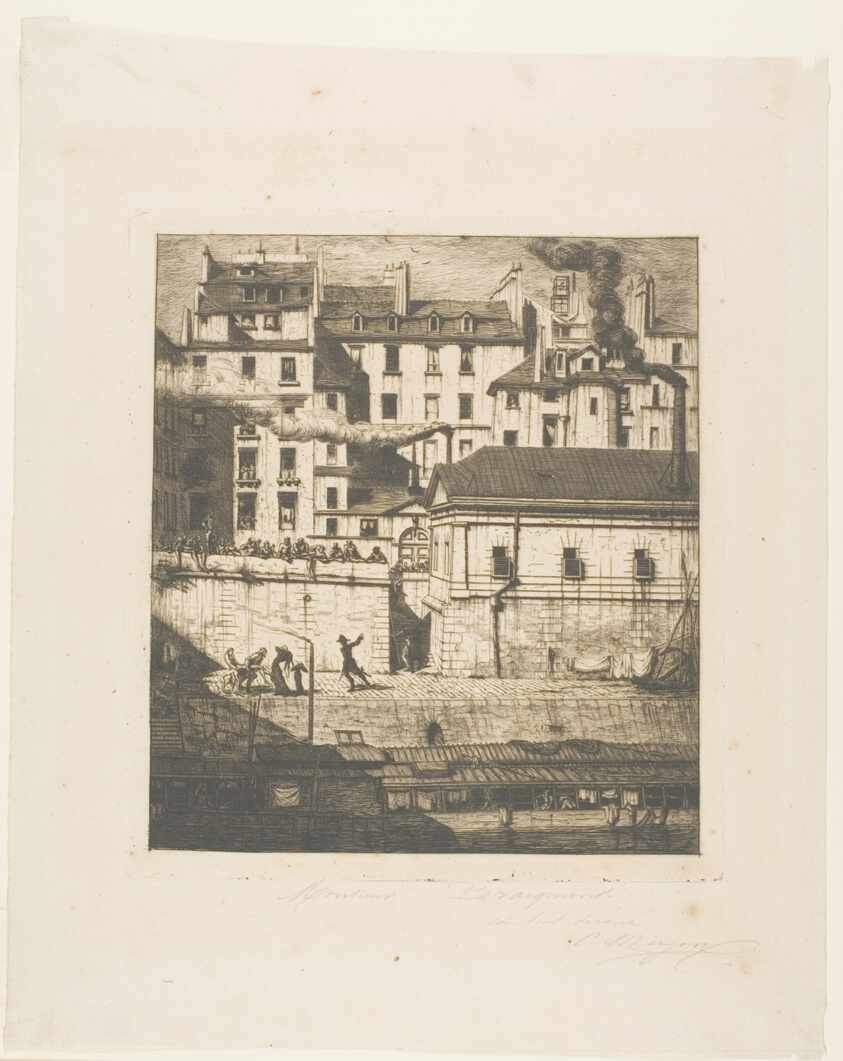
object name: Print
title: The Mortuary, Paris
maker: Charles Meryon (French, 1821-1868)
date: 1854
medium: Etching and drypoint on ivory laid paper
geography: France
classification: etching; print; prints and drawing